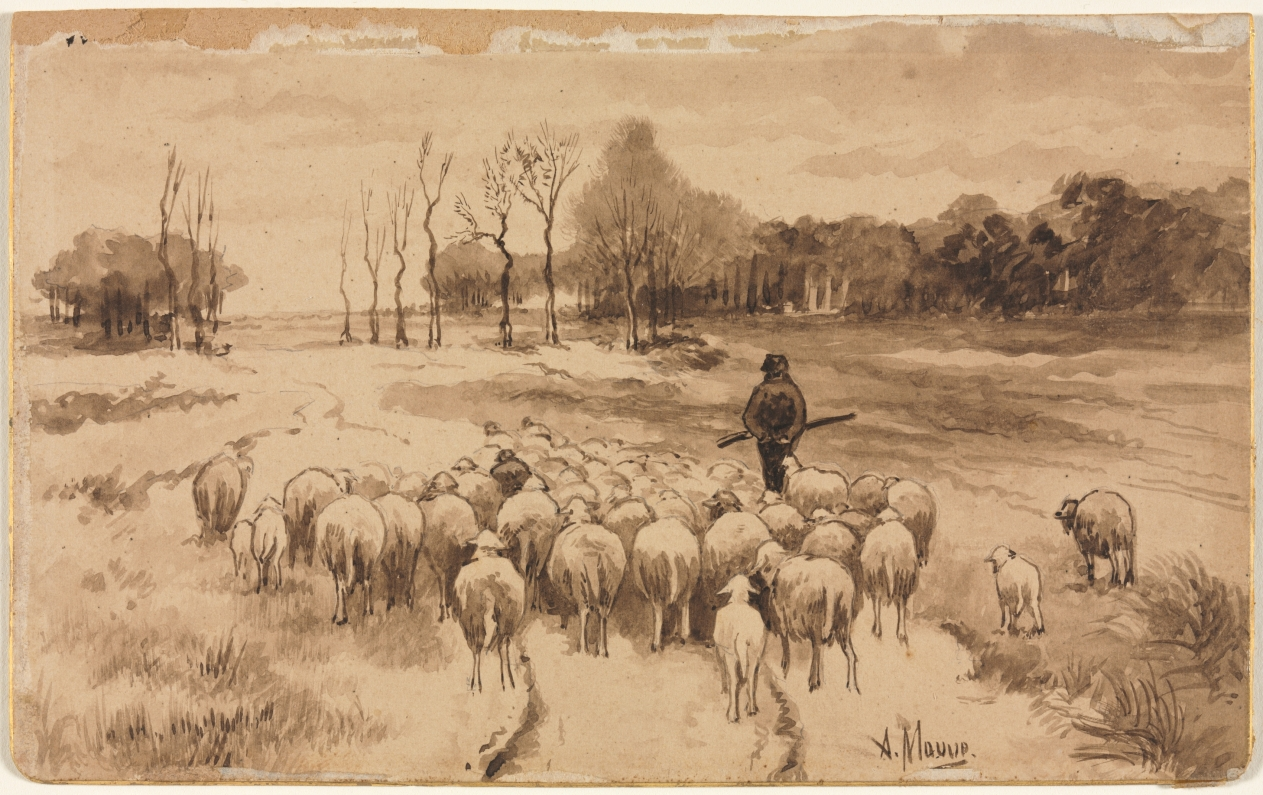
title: Shepherd with His Flock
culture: Netherlands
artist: Anton Mauve (Dutch, 1838–1888)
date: c. 1870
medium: pen and brown ink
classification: Drawing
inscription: signed, lower right, in brown ink: A.Mauve. ["Mauve" partially underlined; line partially effaced by remains of paper previously adhered at lower edge]